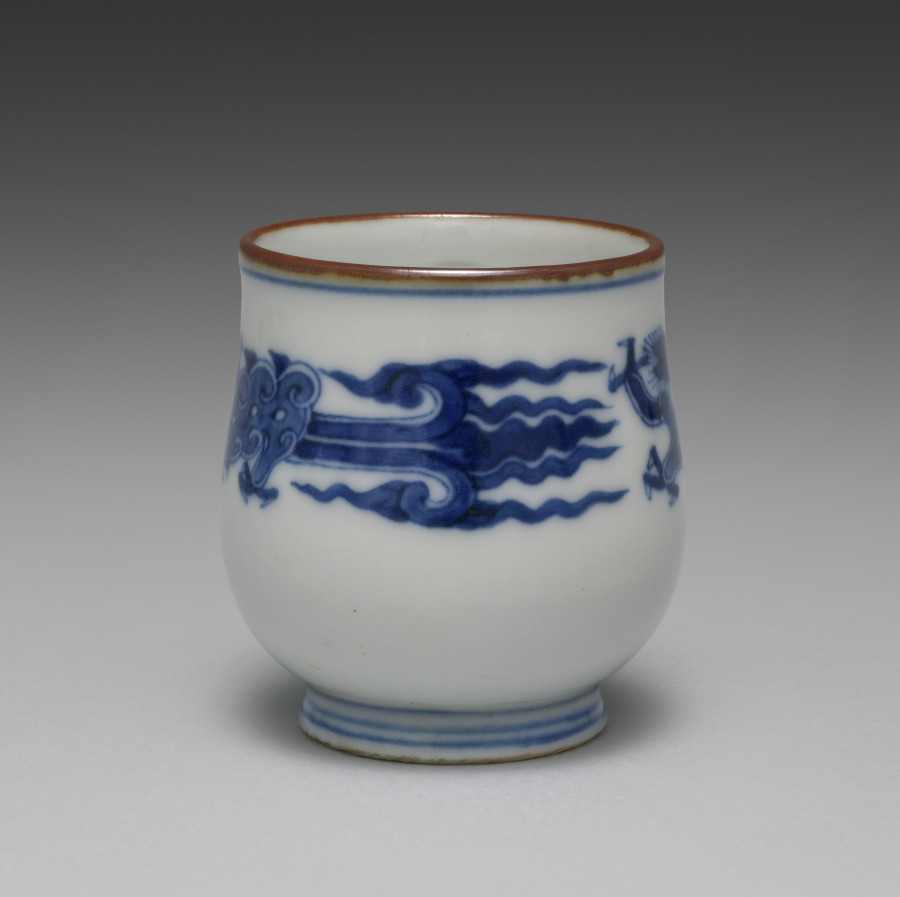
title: Cup from Sake Cups with Dragons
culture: Japan, Meiji period (1868–1912)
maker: Seifū Yohei III (Japanese, 1851–1914)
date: c. 1893–1914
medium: One from a set of six sake cups; porcelain with underglaze blue and iron oxide rims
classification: Ceramic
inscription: 大日本清風造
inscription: 清風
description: Each of these sake cups pictures two backward-looking dragons. The highly stylized creatures resemble jade carvings.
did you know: Seifū Yohei III was inspired by the Chinese mythical animals that were common on porcelain objects made at Jingdezhen in China during the Ming dynasty (1368–1644) and then exported around the world.